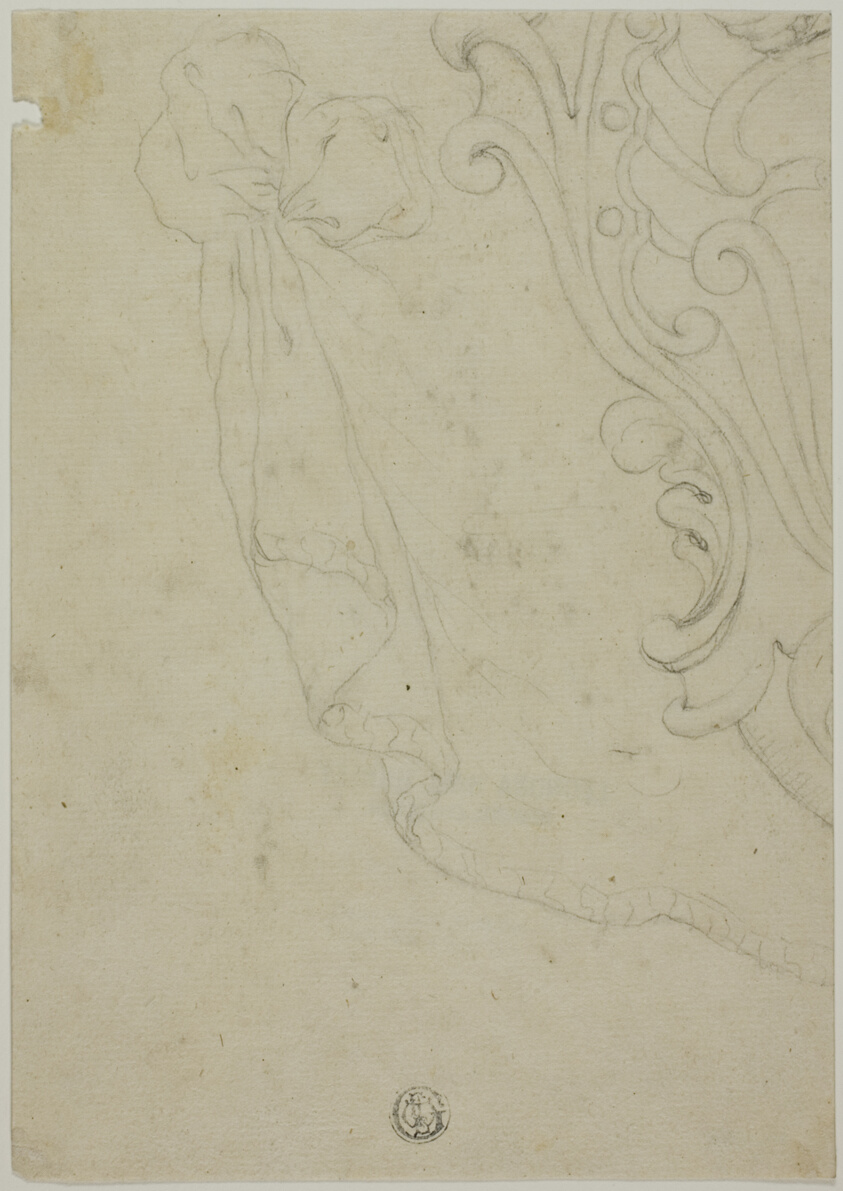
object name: Drawing and Watercolor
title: Fragment of Scroll Ornament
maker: Unknown Artist; European, 18th century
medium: Graphite on cream laid paper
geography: Europe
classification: graphite; drawings (visual works); prints and drawing